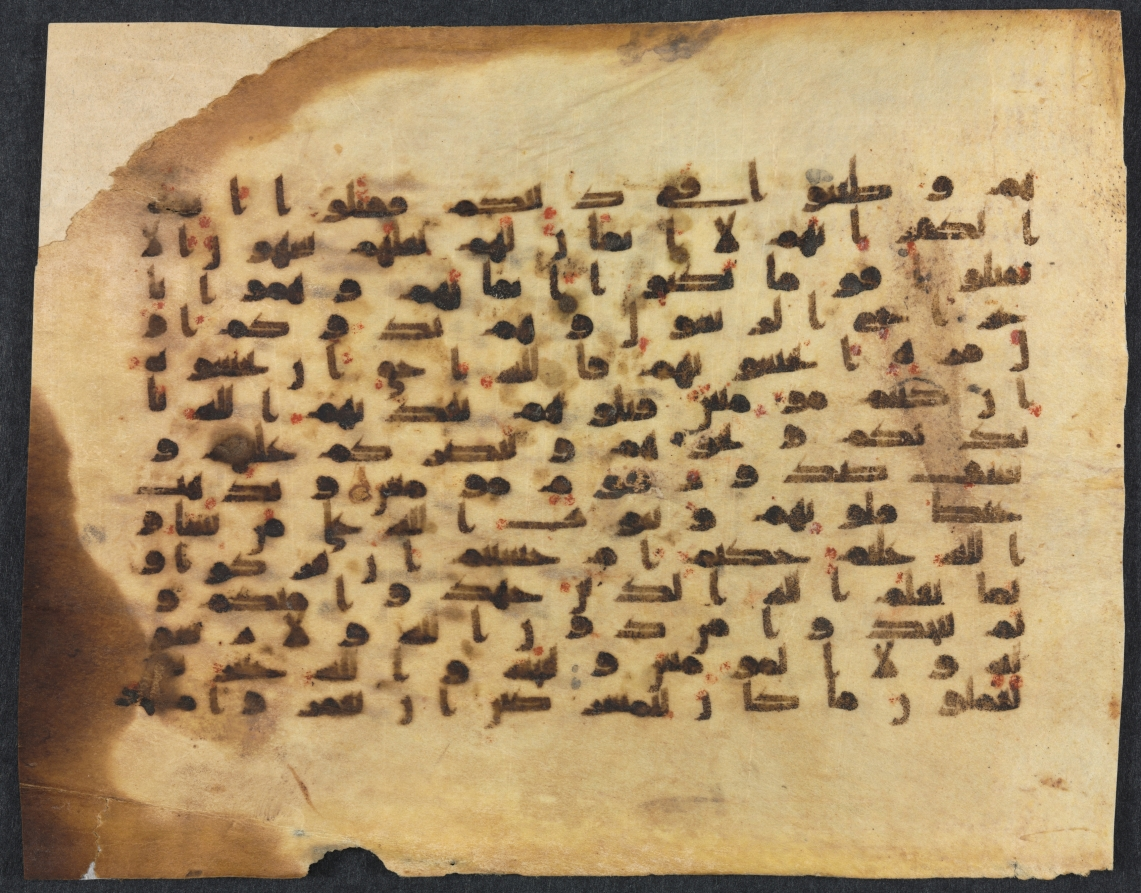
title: Qur'an Manuscript Folio (recto)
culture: Egypt?, Abbasid Period, 9th-10th century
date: 800s-900s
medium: ink, gold, and color on parchment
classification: Drawing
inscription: Kufi Script. 14 Lines to a Page. Recto: Qur'an Sura al-Tawba 9: part 12 - part 17. Verso: Text has almost completely disappeared. TM June 03, 2009